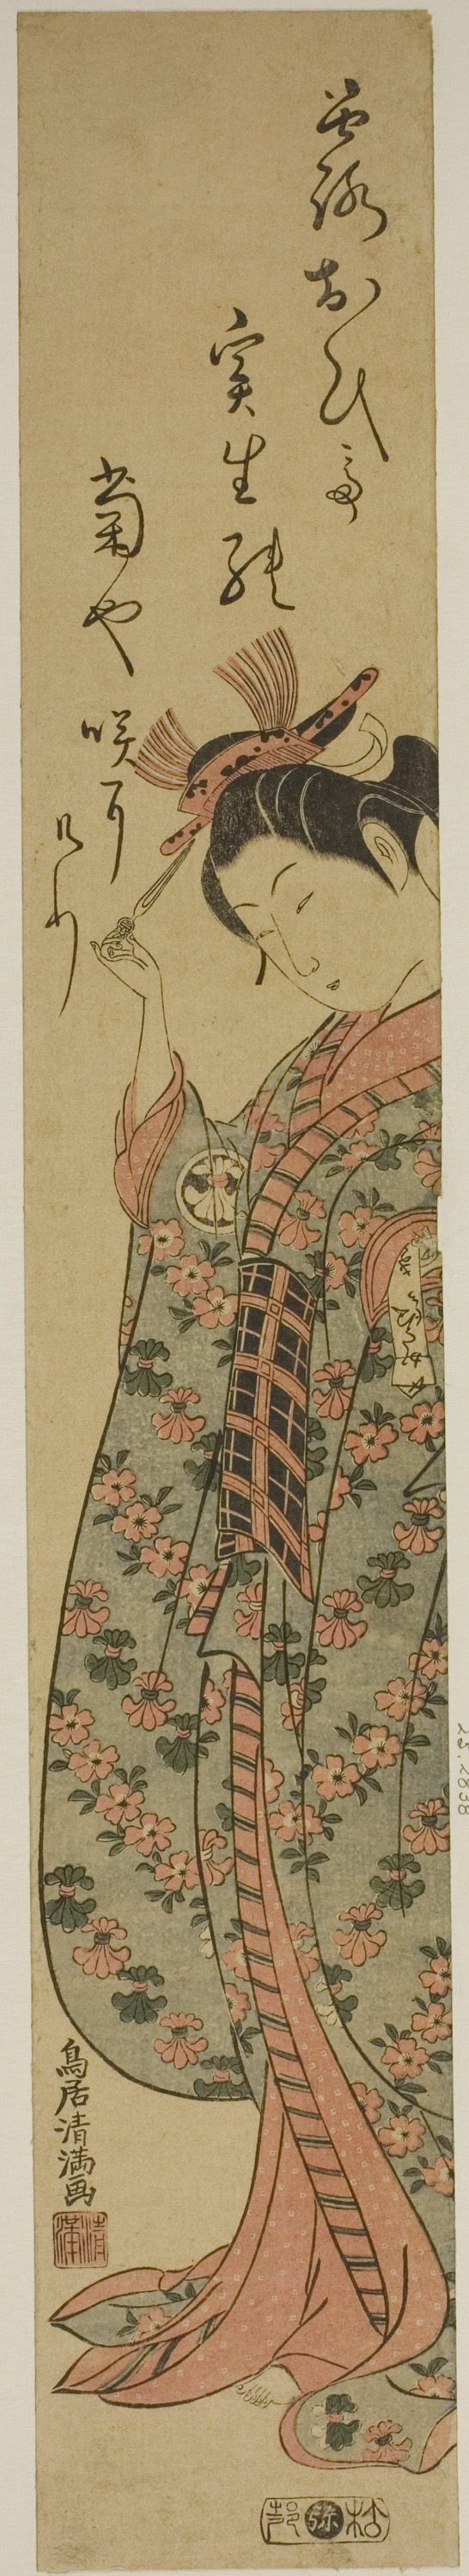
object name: Print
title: The Actor Segawa Kikunojo II as a woman holding a hairpin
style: Japanese (culture or style)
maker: Torii Kiyomitsu I (Japanese, 1735–1785)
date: c. 1760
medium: Color woodblock print; hashira-e, benizuri-e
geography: Japan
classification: woodblock print; print; asian art